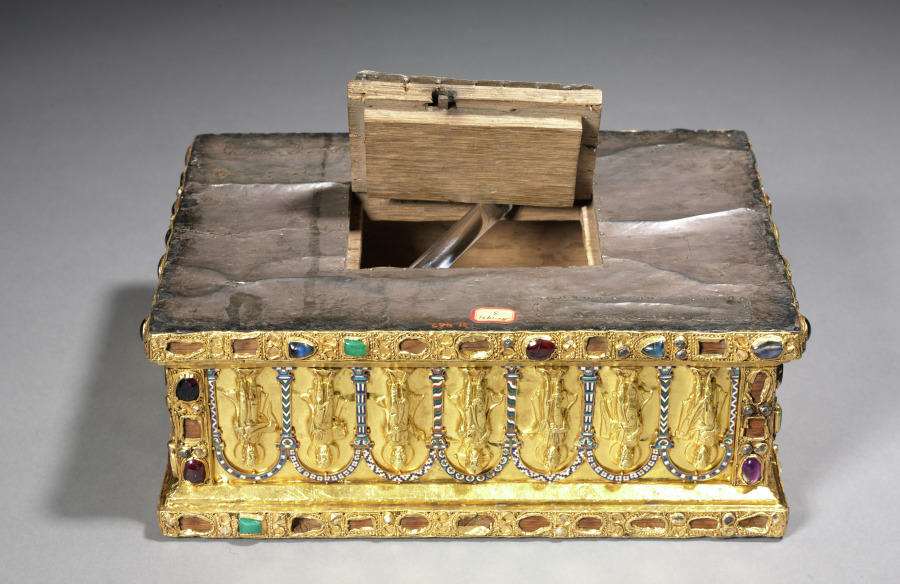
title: Trap door for the Portable Altar of Countess Gertrude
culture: Germany, Lower Saxony?, Romanesque period, 11th century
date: c. 1045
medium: Gold, cloisonné enamel, porphyry, gems, pearls, niello, wood core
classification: Metalwork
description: Commissioned by Countess Gertrude of Brunswick, this portable altar is one of the Guelph Treasure’s earliest and most sumptuous objects. The choice of white-speckled porphyry as the altar stone signals Gertrude’s worldly aspirations; an imperial color since classical antiquity, porphyry was only used by the imperial family. Historical figures of royal and imperial rank are depicted with Christ, the Virgin, apostles, and archangels along the altar’s sides, stressing the countess’s political ambitions and claim of imperial lineage for her own dynasty. The Latin inscription surrounding the altar stone reads, "Gertrude offers to Christ, to live joyfully in him, this stone that glistens with gems and gold."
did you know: By removing this door located on the bottom of the altar, the numerous small relics of saints wrapped in silk are revealed.